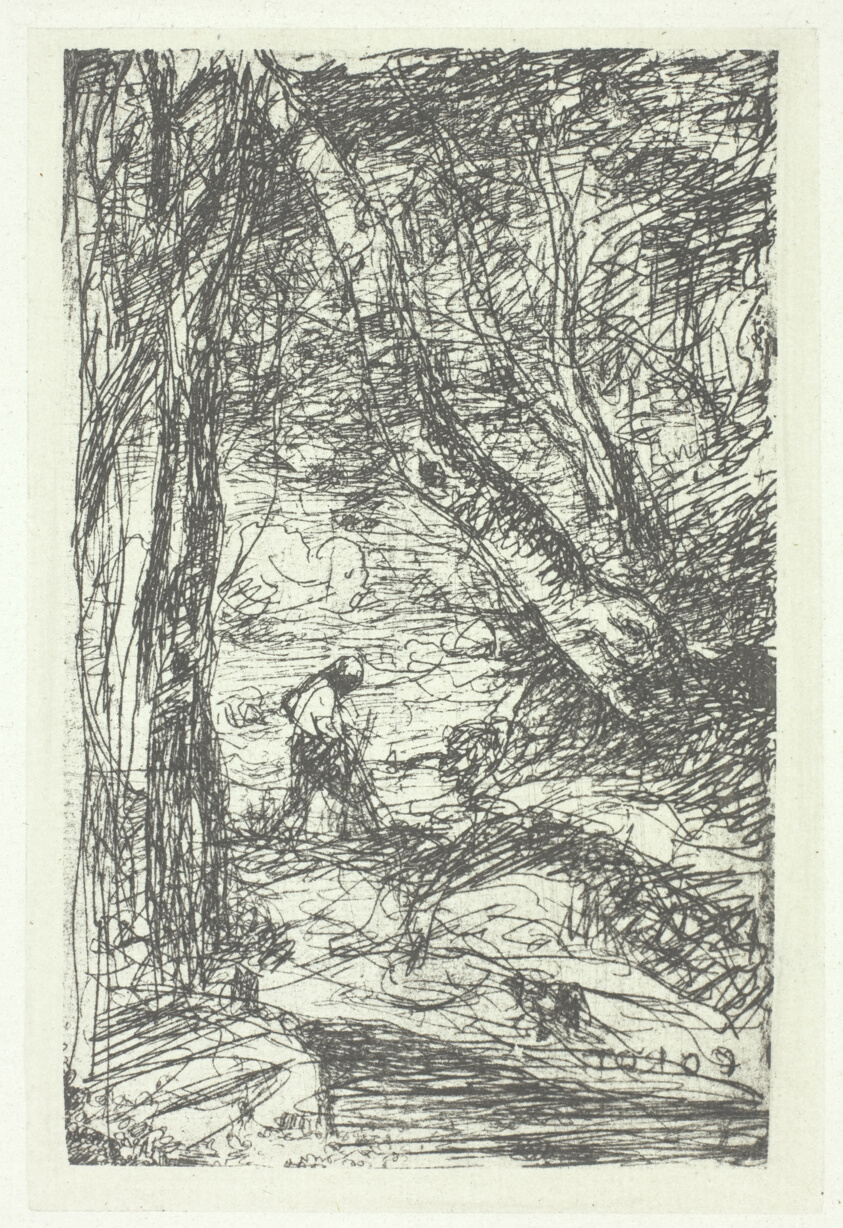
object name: Photograph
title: Le bucheron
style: 19th century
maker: Charles Nègre (French, 1820–1880)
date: possibly 1857, printed 1982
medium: Photogravure, from the portfolio Charles Negre: Treize Heliogravures, 1854–1857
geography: France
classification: photogravure; photomechanical process; photography; photograph